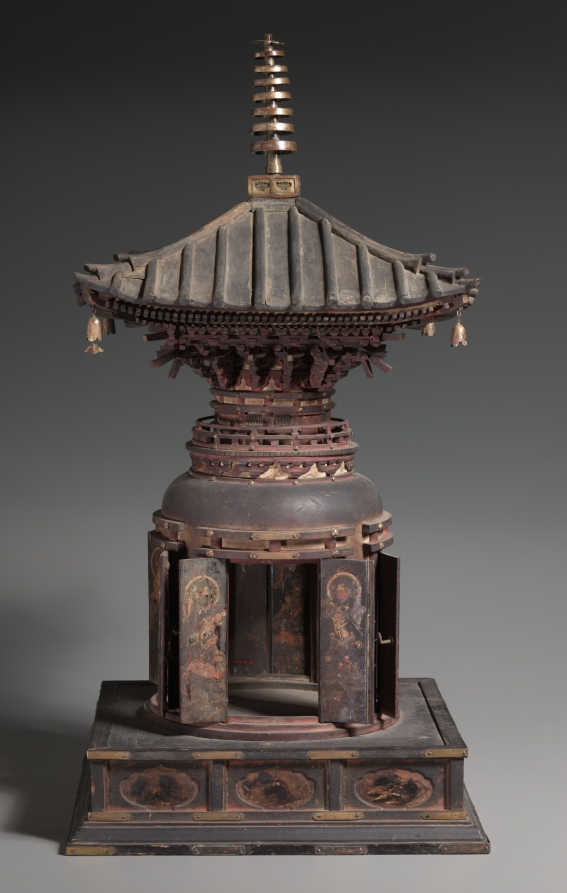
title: Many-Jeweled Stupa Reliquary (Tahōtō shari yōki)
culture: Japan, Kamakura period (1185–1333)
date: early to mid-1300s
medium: wood and metal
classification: Sculpture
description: Earthen mounds that marked the sites of interred relics in ancient India are called stupas. As Buddhism traveled through East Asia, the mounds took on the form of towers called “pagodas” by Westerners. This miniature tower, painted with Buddhist deities on the interiors of the doors on each side, likely once held items considered to be sacred relics. The deities on the doors have been tentatively identified as the four bodhisattvas of the sacred text the Lotus Sutra, and two Guardian Kings known as Niō.